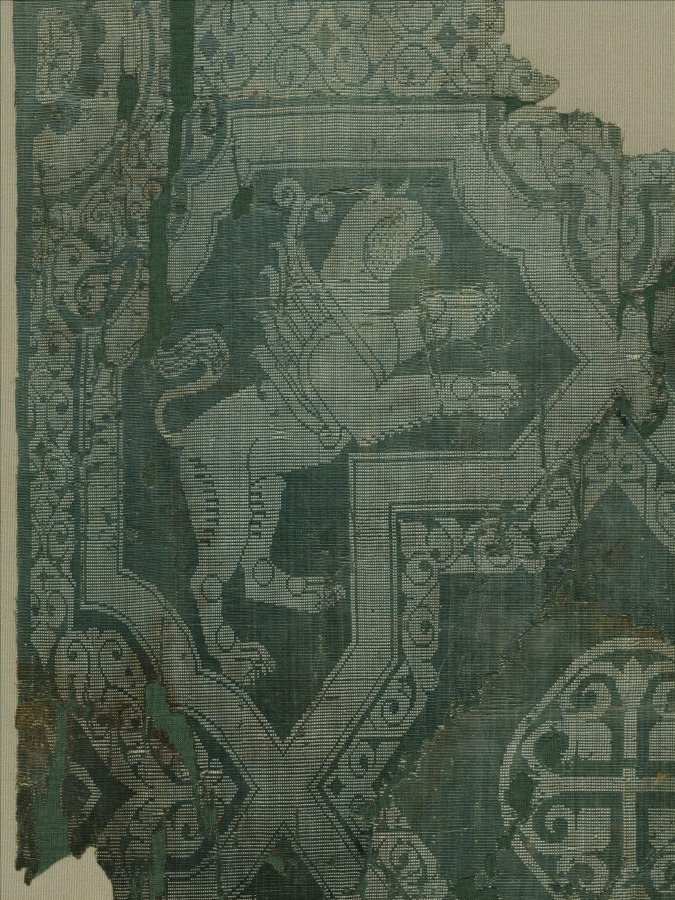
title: Fragment with star pattern and griffins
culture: Iraq or Iran, Buyid period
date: 950–1050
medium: silk: plain weave variation with supplementary weft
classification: Textile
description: This fragment's design consists of interlaced bands, bordered with inner band of foliate ornament, forming an eight-pointed star with center of floriated cross and flanked in four corner compartments by winged griffins. It was woven in green and white silk. The warp in green silk has two wefts, one of green silk and one of white silk floss for the design.